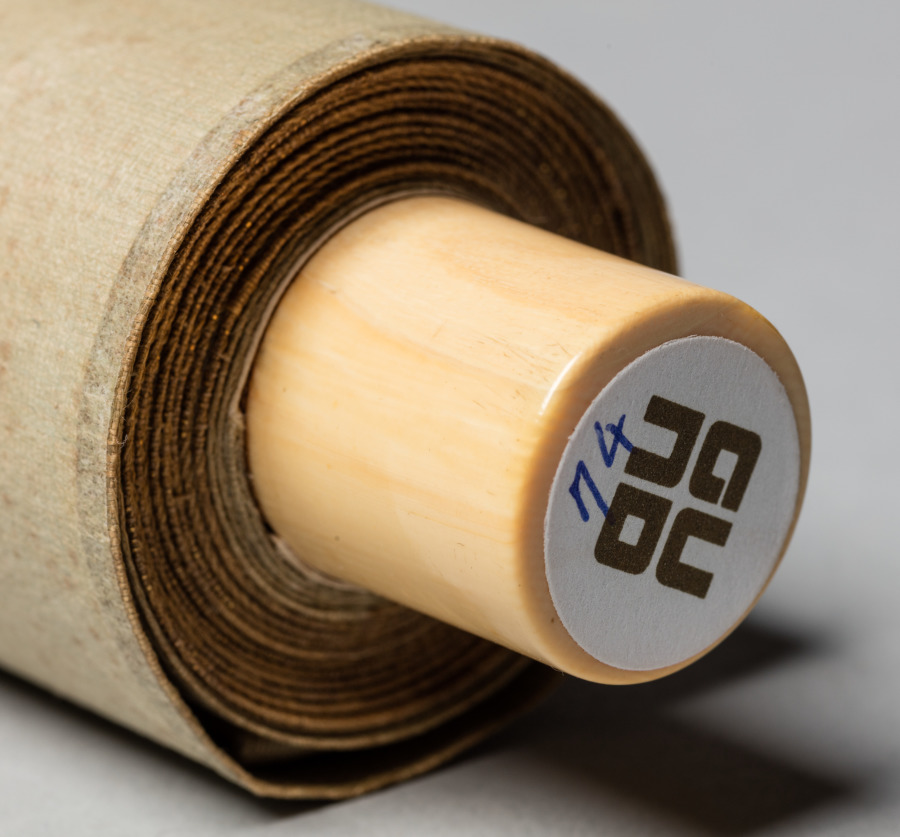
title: Landscape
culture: Japan, Muromachi period (1392–1573)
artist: Narihide (Japanese, active 1500s)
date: 1500s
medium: hanging scroll; ink on paper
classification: Painting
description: This composition includes imagery from the Eight Views of the Xiao and Xiang Rivers. Scanning the composition from top to bottom, at least six of the views are discernible: night rain over Xiao and Xiang, evening bell from a mist-shrouded temple, returning sails off a distant shore, geese descending to a sandbar, mountain village in clearing mist, and sunset glow over a fishing village. Inside the painting’s box is a document with a long inscription by prominent calligrapher, collector, and connoisseur Maeda Kōsetsu (1841–1916) discussing the painting’s subject and the matter of the painter’s biography—he appears to have been a Kano school artist, but his precise identity is unclear.